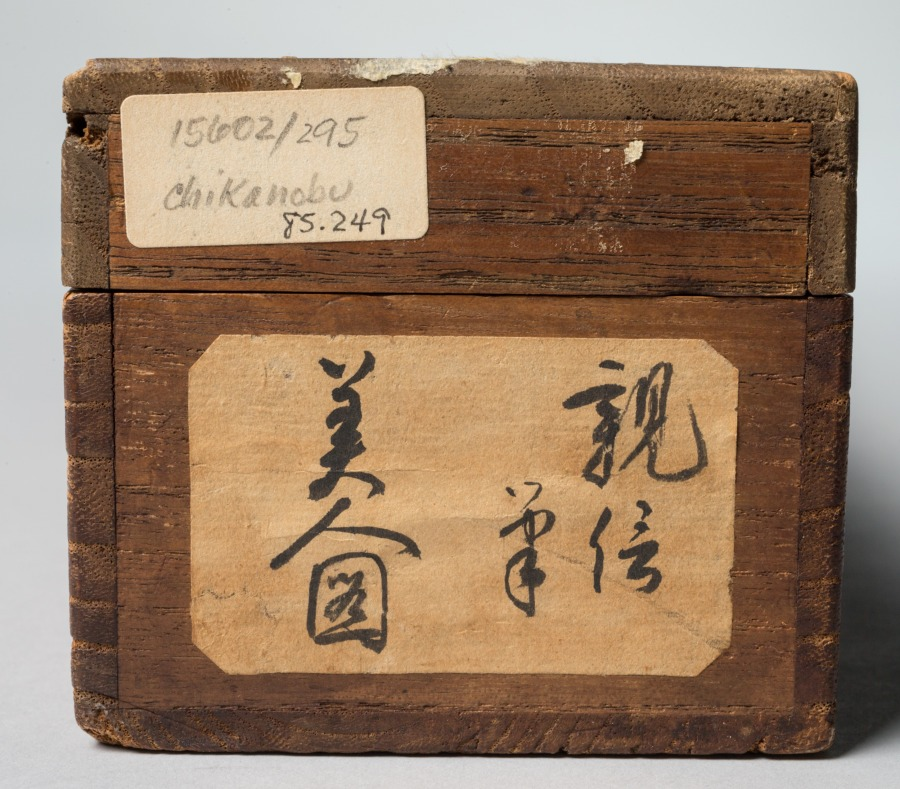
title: Courtesan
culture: Japan, Edo period (1615–1868)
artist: Matsuno Chikanobu (Japanese, active 1716–35)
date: 1716–35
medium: hanging scroll; ink and color on paper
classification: Painting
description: A glamorous courtesan sports an outer robe decorated with large roundels featuring plant motifs including iris and bush clover. Little is known about the life and artistic training of the painter Matsuno Chikanobu, an ukiyo-e artist who painted in a style strongly reminiscent of that of the Kaigetsudō studio. Many of his known paintings are on silk, and executed with high quality pigments, indicating that his primary clientele were wealthy individuals.